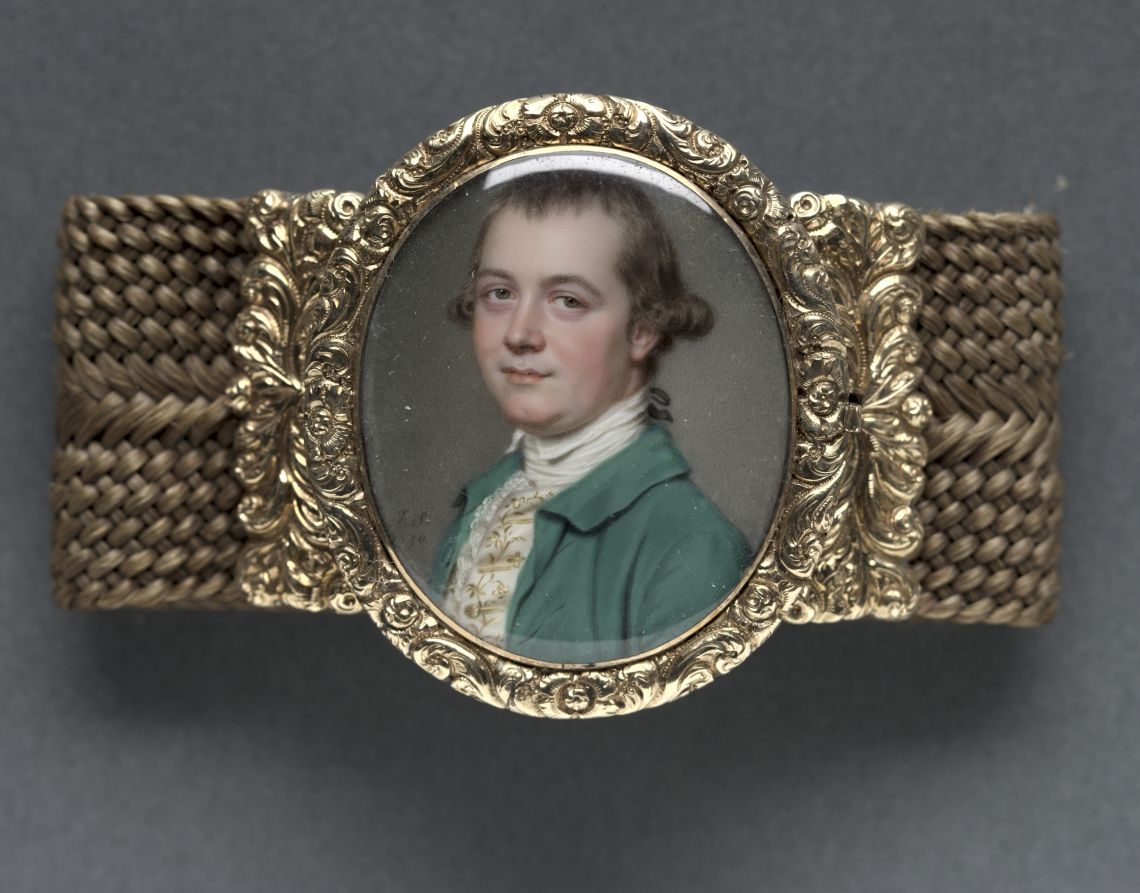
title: Portrait of Constantine Phipps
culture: England, 18th century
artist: John I Smart (British, 1741–1811)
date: 1770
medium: watercolor on ivory in a later gold and woven hair bracelet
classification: Portrait Miniature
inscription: signed lower left: J.S. / 1770.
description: John Smart painted the British gentleman Constantine Phipps (1746–1797) at the age of twenty-four, executing this portrait in 1770, the year following the death of the sitter’s father, Constantine Phipps (1710?–1769), and preceding his marriage to Elizabeth Tierney (d. 1832). Phipps the younger was the second son of a landowner and lived throughout England and France. In 1788 he moved his family to Caen, Normandy, hoping to educate his ten (eventually thirteen) children more economically. Phipps and his wife returned to England in 1792 to attend their daughter’s wedding. The escalating conflict between France and England prevented Phipps from returning to France where he had left eight children behind. Unfortunately, he did not see them before his death five years later. The portrait represents Phipps’s nearly full face. He has light brown eyes and natural brown hair worn en queue. He wears a green coat with a small collar, a white waistcoat embroidered with gold, and a high, white stock collar. Phipps is depicted against an olive-gray background. This early work by Smart already exhibits hallmarks of the artist’s style, such as the plain, gray background, the sitter’s colorful clothing, and his expressive eyes and slightly upturned mouth, which suggest that Phipps was a self-assured man with a sense of humor. The small format is also characteristic of the first decade of Smart’s career. This miniature is mounted in an elaborately carved gold frame on a bracelet made of gold and woven light brown human hair. The bracelet was executed later than the miniature and is in the style of the 1830s or 1840s. The inscription on the clasp reads “E. C. E. T. / Nov.r 29th 1838, aged 7” and may indicate that this bracelet was given to Constantine’s great-granddaughter Elizabeth Clarissa Emilie Toker (1831–1888) on her seventh birthday possibly by her mother or grandmother. There is a variant of this work in the Phipps collection in London. Painted in 1771, this miniature descended from Colonel Pownoll Phipps, the seventh child of Constantine Phipps, to John Constantine Phipps.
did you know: This miniature is mounted to a bracelet that was made at least 50 years later.